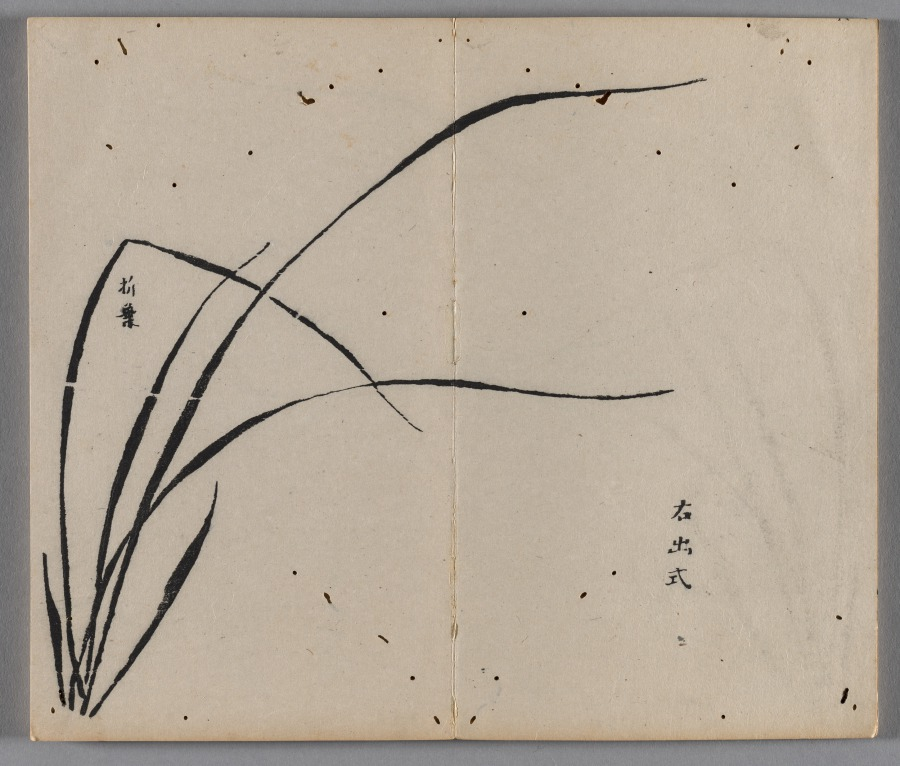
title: Ten Bamboo Studio Painting and Calligraphy Handbook (Shizhuzhai shuhua pu): Orchids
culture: China, Qing dynasty (1644-1911)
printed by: Hu Zhengyan (Chinese, c. 1584–1674)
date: 1633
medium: Woodblock-printed book; ink and colors on paper; first edition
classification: Print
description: Color printing reached a level of perfection in the early 1600s, as seen in this Ten Bamboo Studio Collection of Calligraphy and Painting and the Mustard Seed Garden Manual of Painting (printed 1679 and 1701). The painterly quality, precision in registering (aligning) the woodblocks, and harmonious colors made them the most successful color print editions in Chinese history. Both editions were printed and compiled in Nanjing, spread nationwide, and had a great impact on the arts in Japan and Korea.